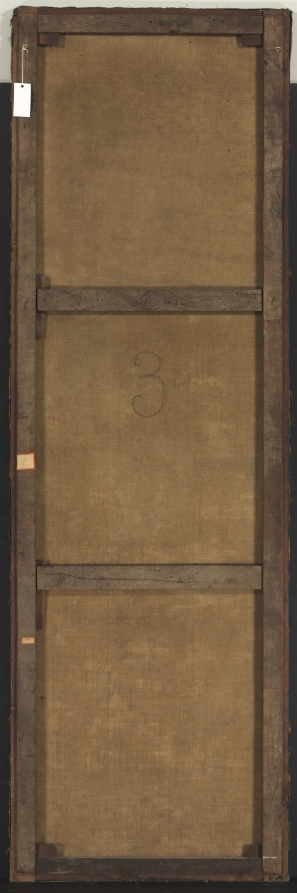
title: Decorative Panel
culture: France, 18th century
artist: Pierre Rousseau (French, 1751–1829)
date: 1790s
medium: oil on canvas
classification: Painting